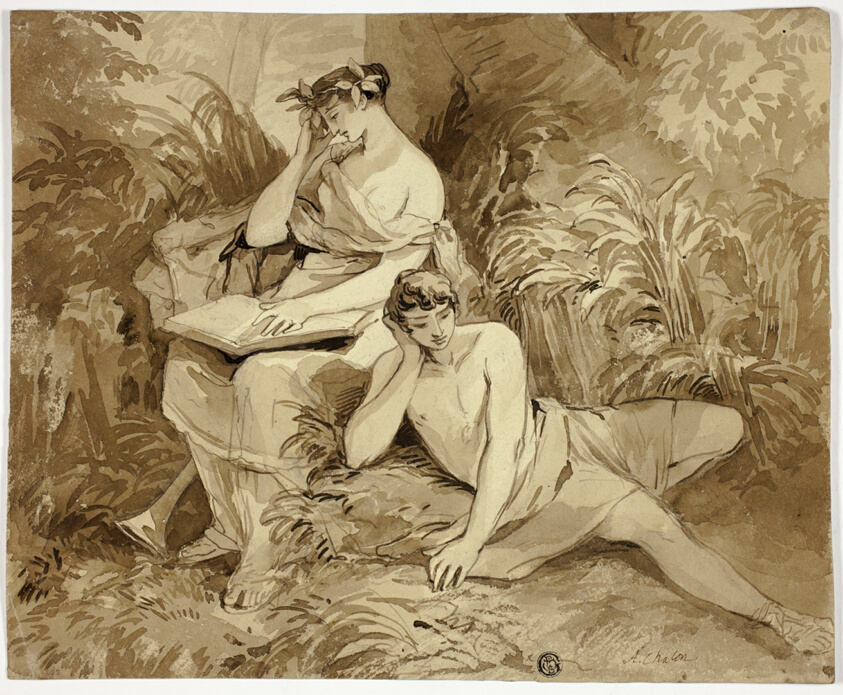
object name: Drawing and Watercolor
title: Muse and Poet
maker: Alfred Edward Chalon (English, born Switzerland, 1780-1860)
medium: Pen and brown ink and brush and brown wash on cream laid paper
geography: England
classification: ink or chalk wash; paper; pen and ink drawings; brush and wash; drawings (visual works); prints and drawing